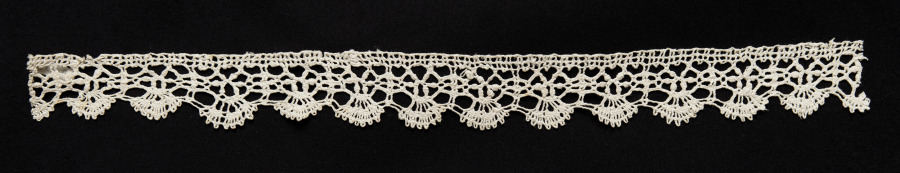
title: Lace Edging of Bell Points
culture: Italy, Genoa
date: 1600s–1700s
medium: Bobbin lace (needle lace design)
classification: Lace